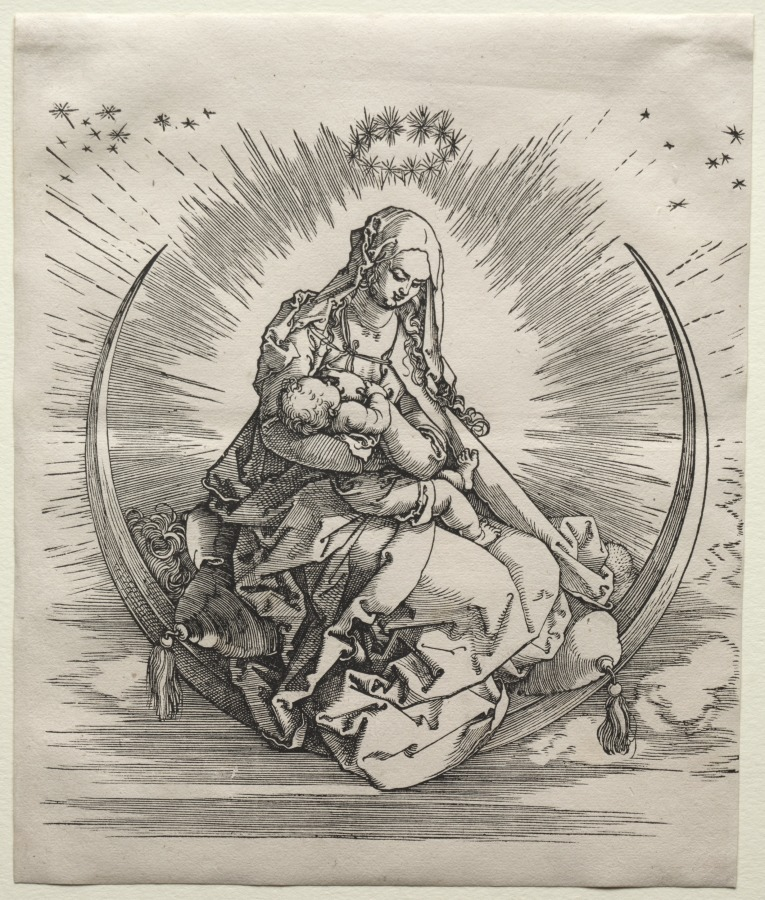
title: The Life of the Virgin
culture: Germany, early 16th Century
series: The Life of the Virgin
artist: Albrecht Dürer (German, 1471–1528)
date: c. 1510–11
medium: woodcut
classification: Print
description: The frontispiece of the series is a modification of the devotional imagery Dürer used in his depictions of the Virgin and Child standing in a crescent moon. Here, he also incorporated the themes of the nursing Madonna and the Madonna of Humility, often shown seated. In doing so, Dürer fused the Virgin’s regal, motherly, and humble natures into one striking image.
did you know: Dürer's cycle depicting Mary's life, which gained instant acclaim, was remarkable not only for its theological accuracy but also for its unprecedented wealth of detail.